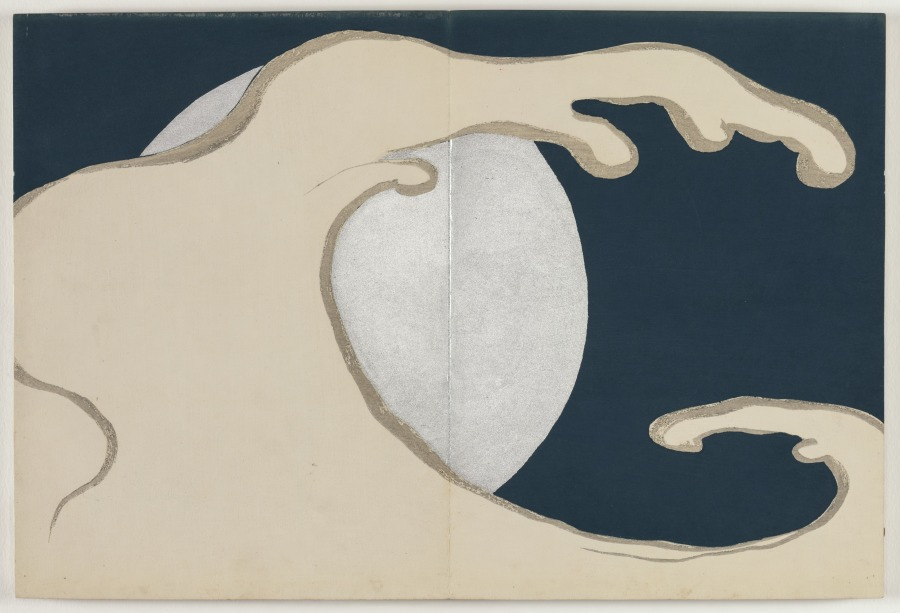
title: Flowers of a Hundred Worlds (Momoyogusa): Rising Waves (Tachinami)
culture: Japan, Meiji period (1868–1912)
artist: Kamisaka Sekka (Japanese, 1866–1942)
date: 1909–10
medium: color woodcuts with gold and silver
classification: Bound Volume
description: This print from a set of three woodblock printed albums displays the graphic design prowess of Kamisaka Sekka. The images were first distributed one by one to subscribers to the series but later were reissued in bound form, like this book, for mass consumers. Each print features a vignette taken from nature or Japanese literature. Many of the scenes have a long history in Japan, originating in the 900s or 1000s and having been interpreted by all manner of artists since that time. Sekka’s selections hew closely to precedents from the Rinpa style originated by painter Tawaraya Sōtatsu (c. 1570–c. 1640) and calligrapher Hon’ami Kōetsu (1558–1637).